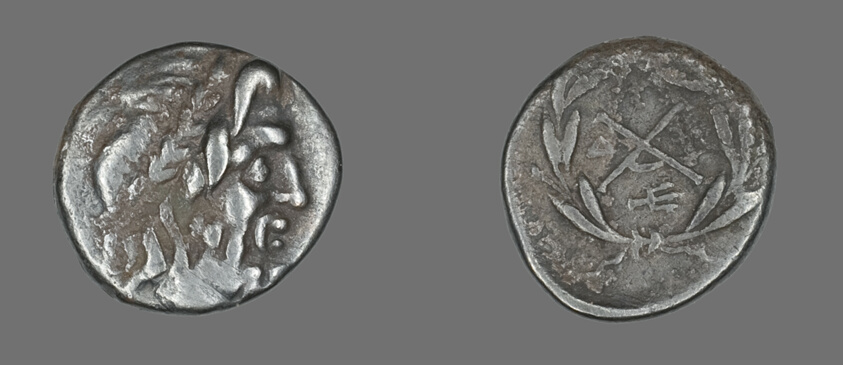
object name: Coin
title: Hemidrachm (Coin) Depicting the God Zeus Amarios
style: greek, ancient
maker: Greek, minted in Mantineia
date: 222-146 BCE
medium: Silver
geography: Mantinea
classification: coin; ancient art